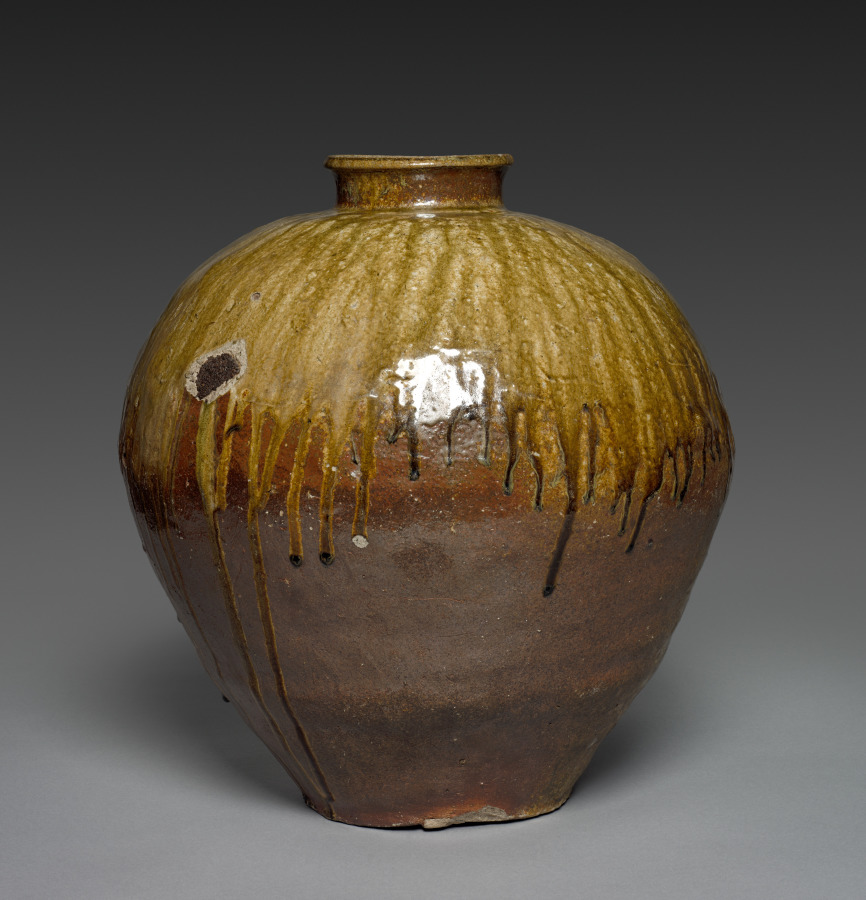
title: Storage Jar, Echizen Ware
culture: Japan, Muromachi period (1392–1573)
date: 1400s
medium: stoneware with natural ash glaze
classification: Ceramic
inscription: Incised artisan's mark